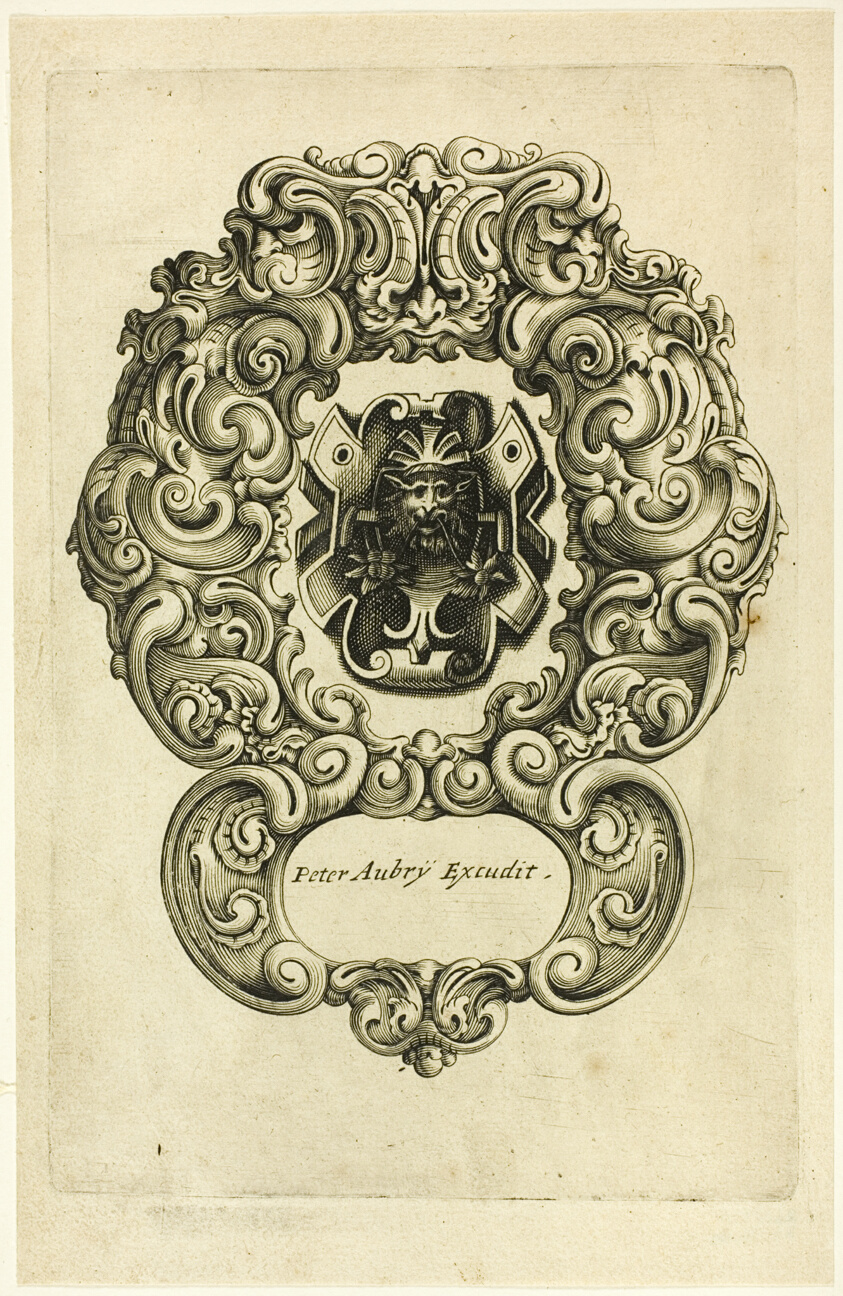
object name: Print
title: Title Page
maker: Peter Aubry (German, 1596-1668)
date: 1630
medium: Engraving on paper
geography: Germany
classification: engraving; print; prints and drawing